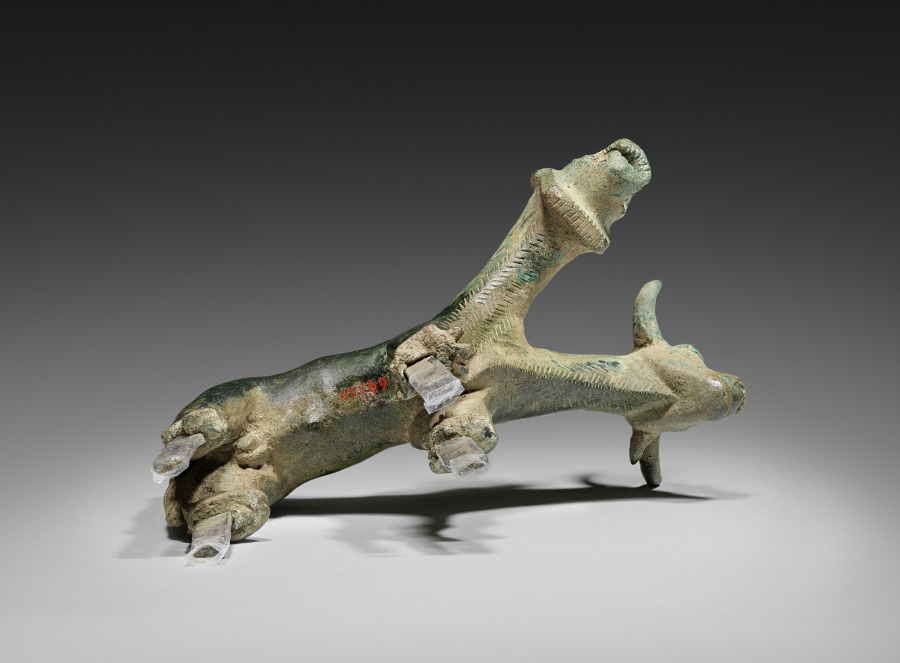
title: Composite Lion and Bull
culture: Iran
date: 1500–1000 BCE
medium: bronze, cast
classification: Sculpture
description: Combining the strength of the lion and the fertility of the bull, this creature must have served as an object of worship in a temple or shrine.